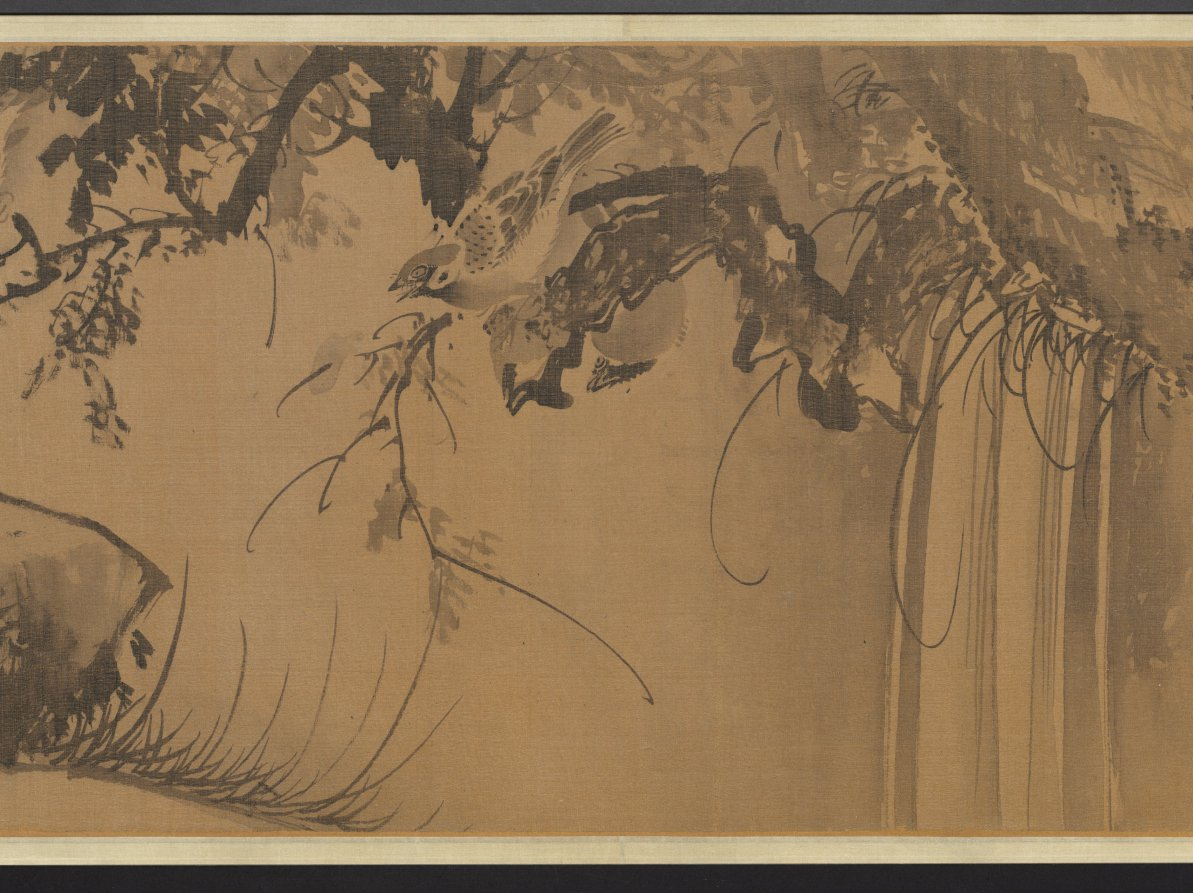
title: A Hundred Sparrows in a Lofty Grove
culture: China, Ming dynasty (1368–1644)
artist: attributed to Lin Liang (Chinese, 1416–1480)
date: 1368–1644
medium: handscroll; ink on silk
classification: Painting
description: Sparrows engaged in all kinds of activities frolic amid leafy branches, blades of grass, rocks, and a waterfall. As our eyes move over the scroll, the artist engages us in enjoying the sparrows’ carefree movements in a natural setting. The charming birds were painted from close observation in swift and fluent brushstrokes. Sparrows are a common bird and in Chinese painting they often represent the commoner in human society as opposed to the noble pheasant or peacock representative of the ruling class.